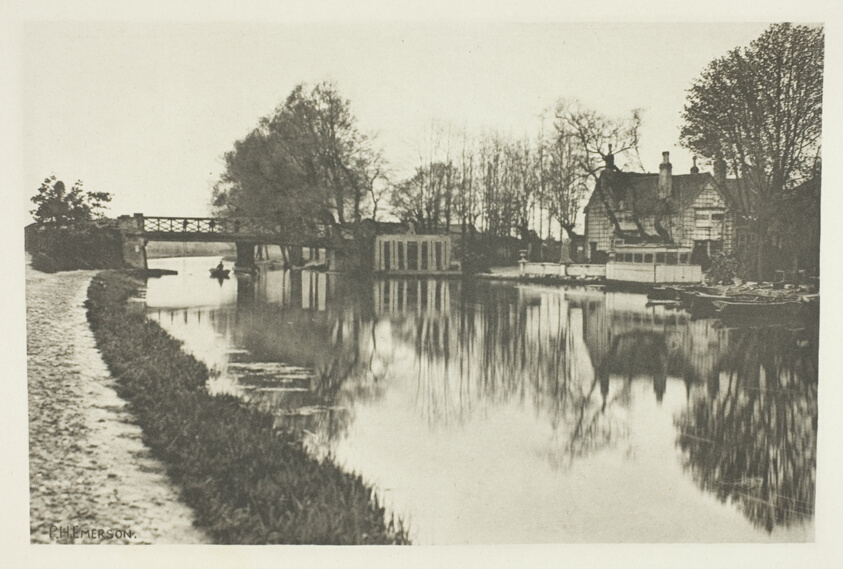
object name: Photograph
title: The Old Rye House Inn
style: 19th century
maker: Peter Henry Emerson (English, born Cuba, 1856–1936)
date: 1888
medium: Photogravure, plate XV from the album "The Compleat Angler or the Contemplative Man's Recreation, Volume I" (1888)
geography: England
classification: photogravure; photomechanical process; photography; photograph